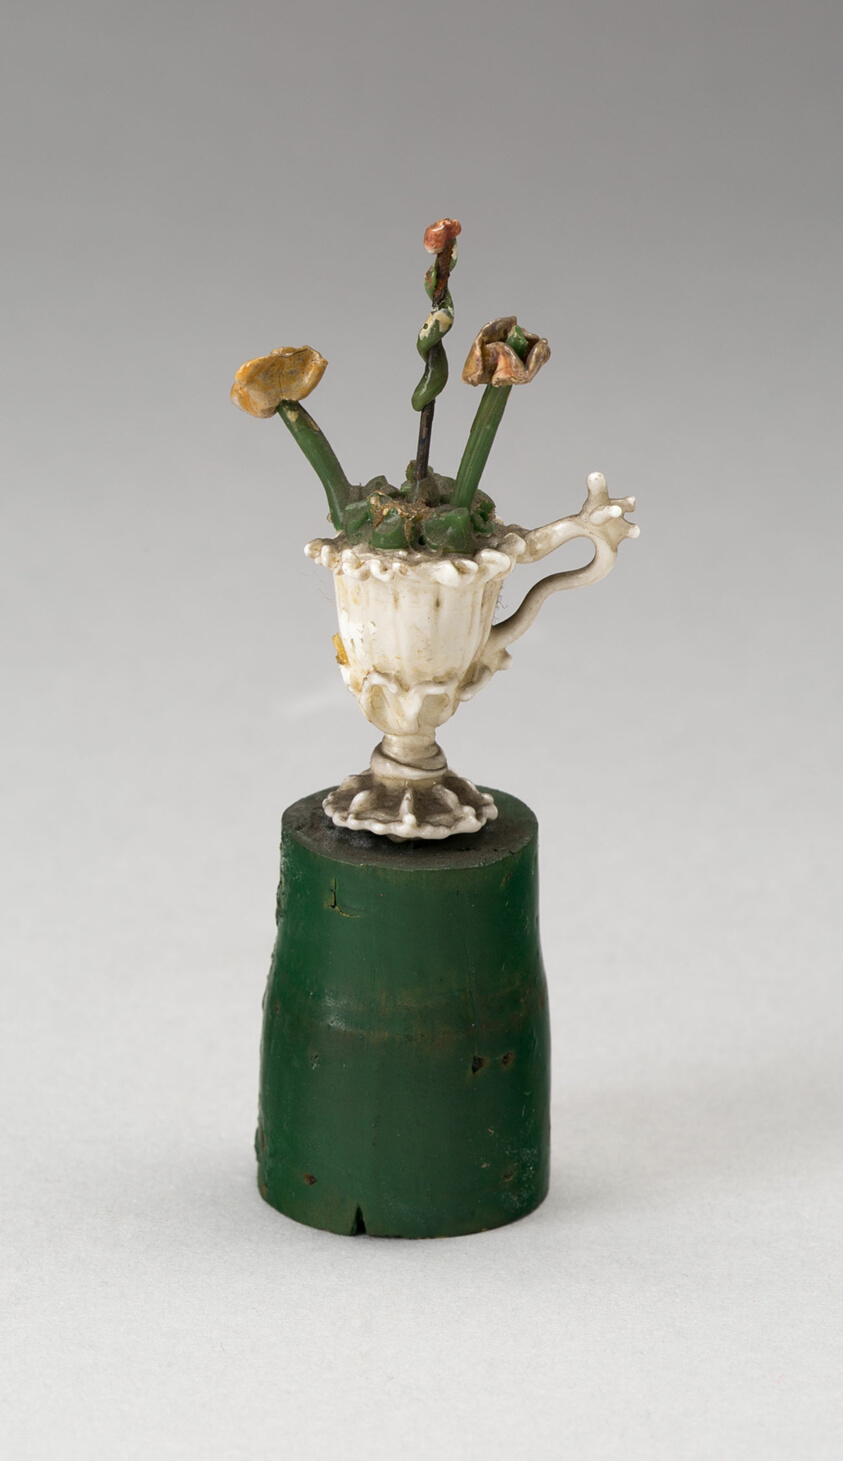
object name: Glass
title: Urn with Flowers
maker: Nevers, France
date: 18th century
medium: Glass; lampwork (verre de Nevers), metal armature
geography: France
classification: glass; miniature; decorative object/ornament; european decorative arts